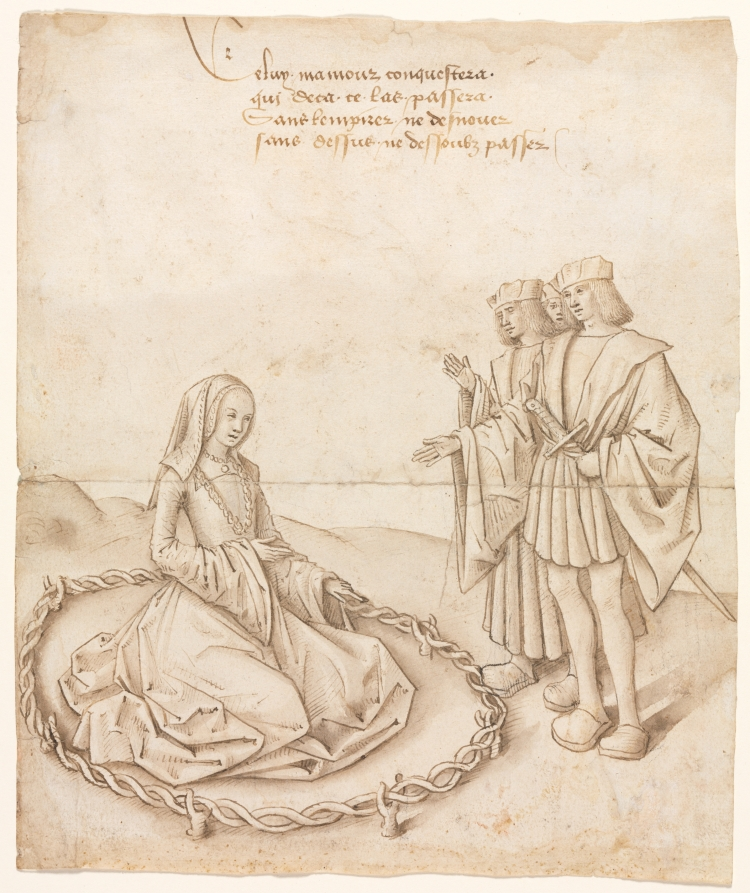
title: A Lady with Three Suitors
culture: France, 16th century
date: c. 1500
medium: pen and brown ink, brush and brown wash, with traces of black chalk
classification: Drawing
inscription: upper center, in brown ink: Celuy mamour conquestera / qui deca ce laß passera / Sanß lempirer ne desnouer / sanß dessuß ne dessoubz passez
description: This mysterious drawing shows an encounter between elegantly dressed members of the noble class. The French inscription above the image suggests that the woman is addressing her suitors and makes it clear that they are concerned with the pursuit of love: He who will conquer my love / This [barrier] must overcome / Neither destroying it nor loosening it / Going neither below it nor above. The style of the clothing reflects French court fashions during the reign of Charles VIII (1483–98), and the subject relates to the tradition of late medieval collections of love riddles that involved verbal exchanges between courtly ladies and gentlemen.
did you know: The simple background and lack of landscape detail in this drawing suggest that the image may have been a model for a tapestry or other textile.